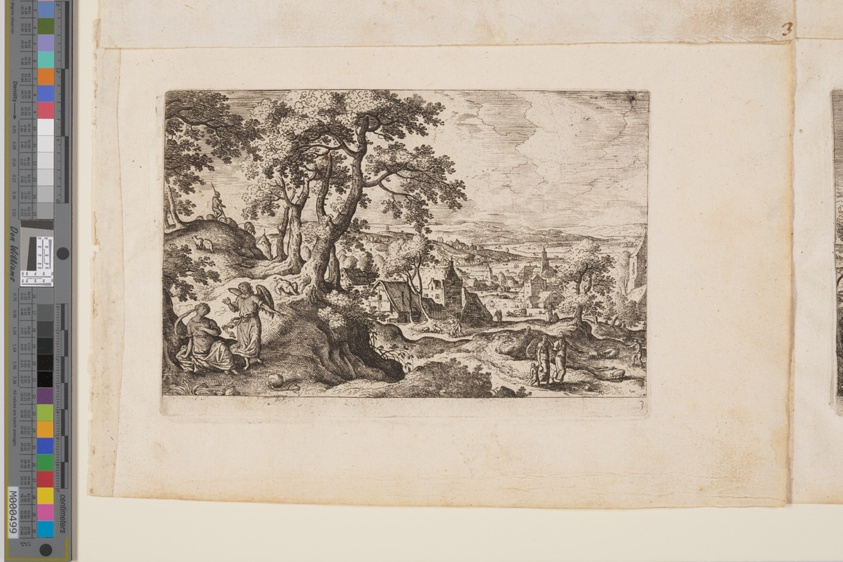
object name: Print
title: Plate 3, from Landscapes with Scenes from the Old and New Testament and Ovid’s Metamorphoses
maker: Hans Bol (Flemish, 1534–1593); published by Philip Galle (Flemish, 1537–1612)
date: 1574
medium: Etching on ivory laid paper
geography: Flanders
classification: print; paper; prints and drawing; etching